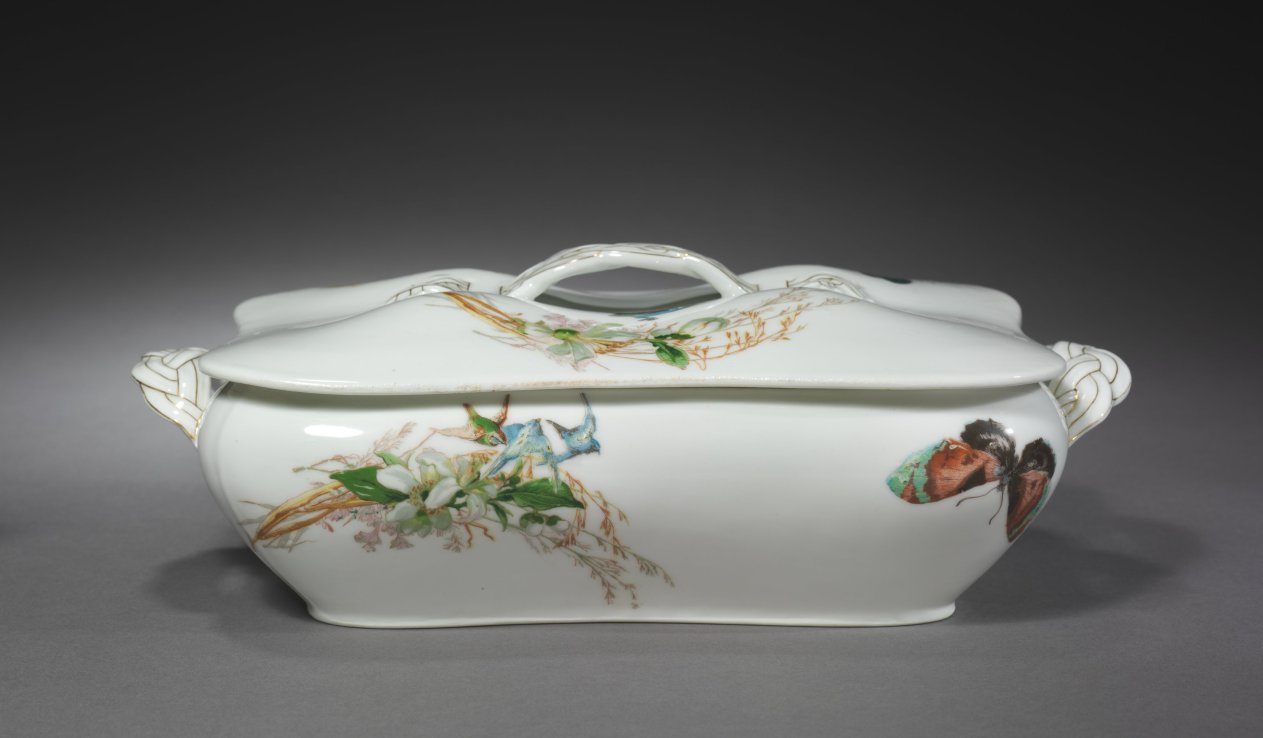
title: Covered Vegetable Bowl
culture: France, Limoges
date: c. 1890–1910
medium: porcelain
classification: Ceramic